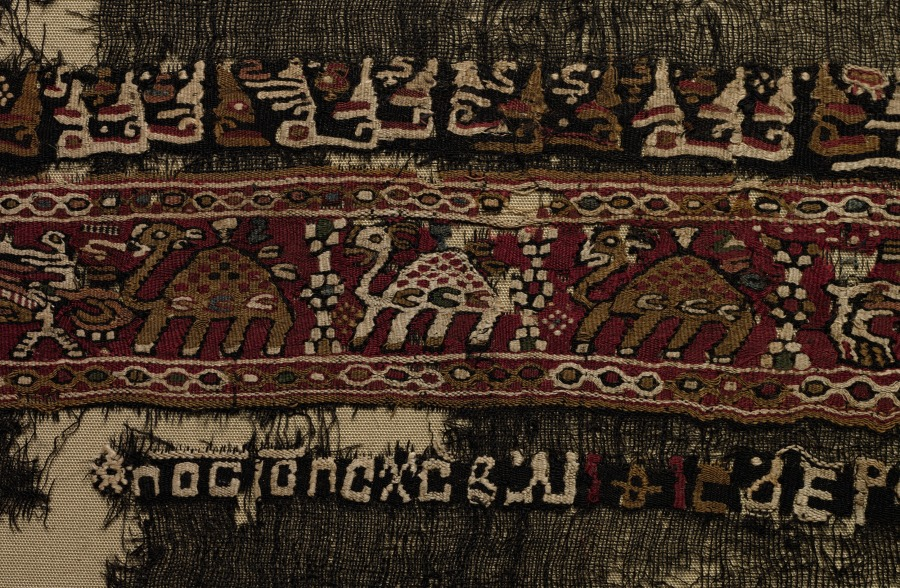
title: Decorated ends of a shawl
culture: Egypt, Fayyum, Tulunid or Ikshīdid period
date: 770–887 (radiocarbon date, 95.4% probability)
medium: Wool, linen, and silk: plain weave with inwoven tapestry weave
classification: Textile